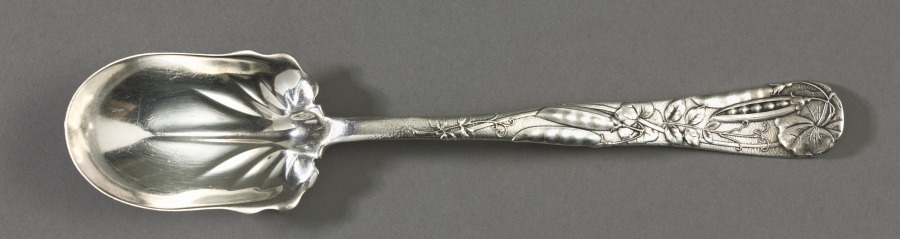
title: Vine Pattern Salad Spoon and Fork Set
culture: America, New York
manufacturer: Tiffany & Co. (America, New York, est. 1837)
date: c. 1872–80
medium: silver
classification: Silver